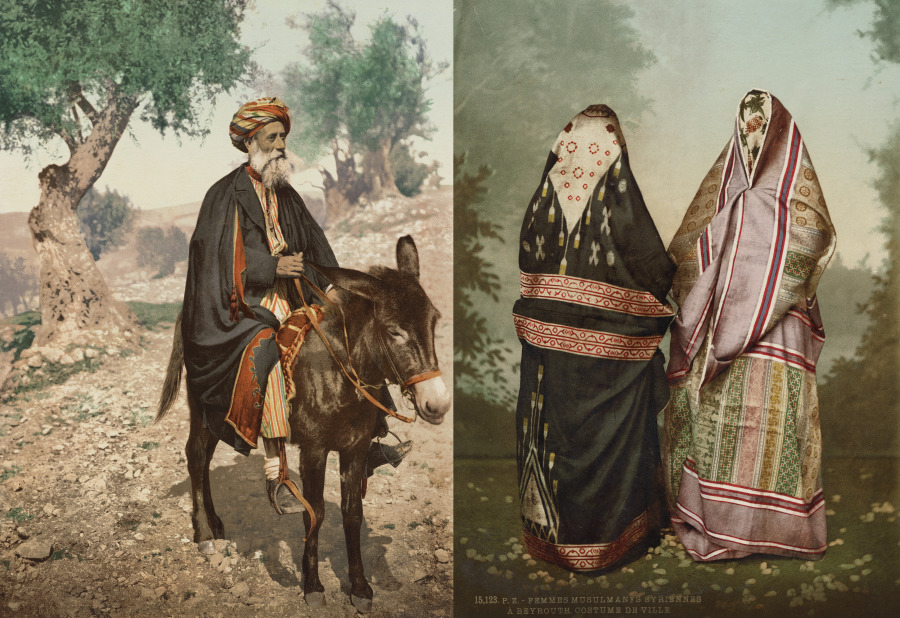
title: Femmes musulmanes Syriennes à Beyrouth, Costume de Ville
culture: France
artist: Félix Bonfils (French, 1831–1885)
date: c. 1880s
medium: Double sided Photochrom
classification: Photograph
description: To make a photochrom, a photographic negative was transferred onto a lithographic stone, then printers created a minimum of six and up to fifteen different stones, each with a single color of ink, which were printed atop the black-and-white image. The printers creating the colors had never seen the original locale. Photochroms were popular from the 1890s into the 1910s and were most often collected in albums or framed and hung on the wall.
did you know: In the early 1880s,FélixBonfils was among the first photographers to use the Photocrom process, which producedcolor images from a single black-and-white negative.